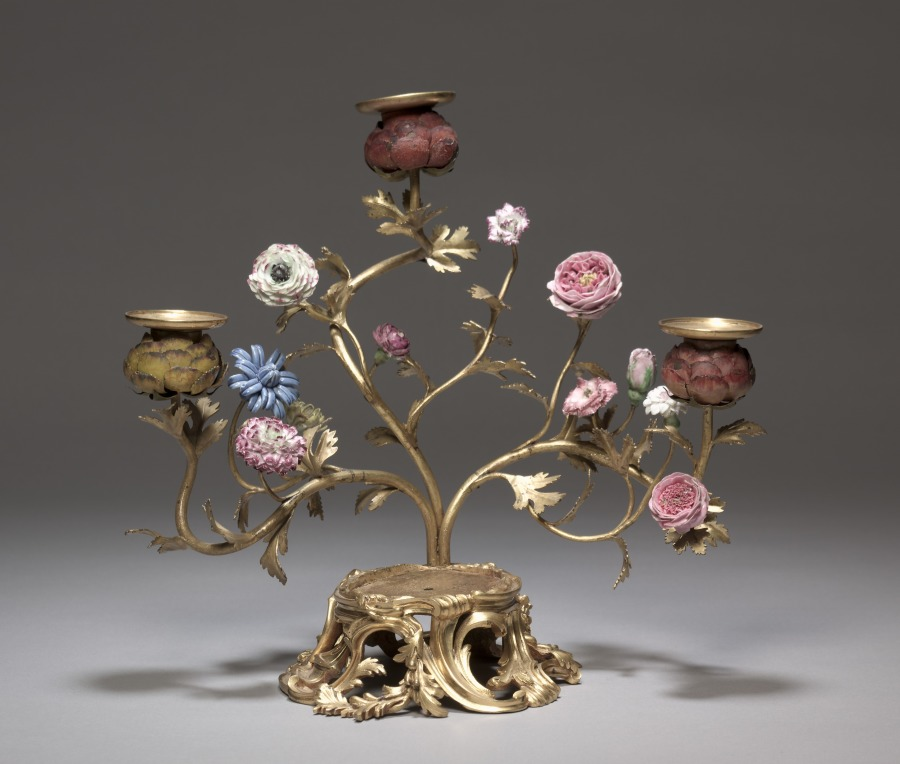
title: Candelabrum with Parrot (Candelabrum)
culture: France, style of Louis XV, 18th century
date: c. 1750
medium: gilt bronze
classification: Furniture and woodwork